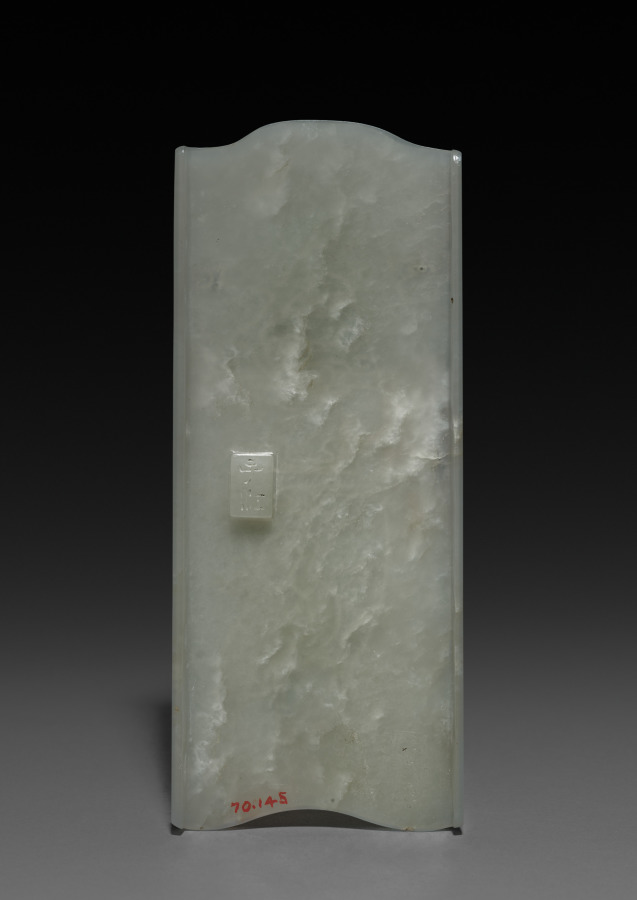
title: Wrist Rest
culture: China, Qing dynasty (1644–1911), Qianlong reign (1736–95)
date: 1736–95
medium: jade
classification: Jade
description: In China, access to political power was granted to those who passed the civil service examinations, a system that offered official service only at a high level of education. Chinese literati-officials, whose daily routine involved administrative work in an office, enjoyed precious objects on their writing desks that offered distraction and demonstrated good taste. By the Ming (1368–1644) and Qing (1644–1911) dynasties, these utensils of the literati studio also became collectibles and were treasured as artworks. The front of this jade wrist rest is carved with a design of a pine tree, clouds, and a crane of immortality holding a branch of lingzhi fungus in its mouth. The raised rectangular boss on the back of the wrist rest is inscribed.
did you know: Wrist rests were used to steady the hand while creating graceful brush strokes.